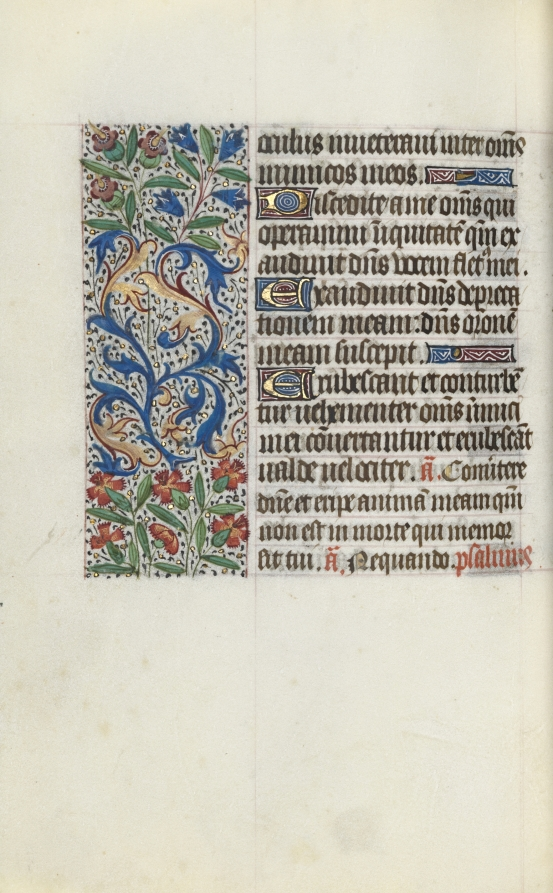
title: Book of Hours (Use of Rouen): fol. 112v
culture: France, Rouen, 15th century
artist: Master of the Geneva Latini (French, active Rouen, 1460–80)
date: c. 1470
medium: ink, tempera, and gold on vellum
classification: Bound Volume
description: In the late 1400s and early 1500s Rouen was an established and important center of book production. The city’s cathedral had a wealthy chapter that spent large sums of money to commission books and to maintain its extensive library. The stationers and booksellers would have likely been concentrated in or near the cathedral precinct. This artist, named after a manuscript now in Geneva, was Rouen’s principal illuminator during the second half of the 1400s.